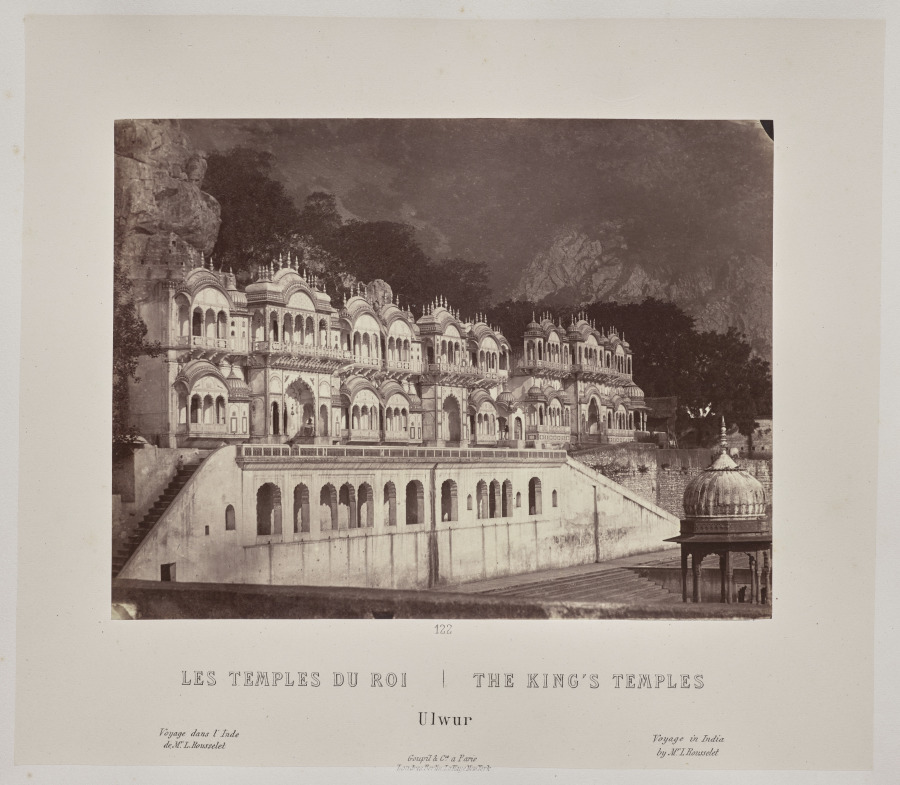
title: The King's Temples, Ulwur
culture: France, 19th century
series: India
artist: Louis-Théophile Marie Rousselet (French, 1845–1929)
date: 1865–68, published 1869–70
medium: Albumen print from glass plate negative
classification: Photograph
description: Concerned that his drawings did not do justice to the splendor of India’s monuments, Rousselet learned photography in India that year, a remarkable accomplishment. He proved to be a talented photographer with a sophisticated sense of composition. The scenes in this volume sweep across sites of Sultanate, Rajput, and Mughal power in northern India, from the sacred Hindu city of Varanasi on the Ganges River to Alwar in Rajasthan. Also included are several scenes of industry and portraits of Indian rulers.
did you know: Louis Rousselet described himself as a “scientific traveler” when he went to India alone at age 18 in 1863 and stayed into 1868.